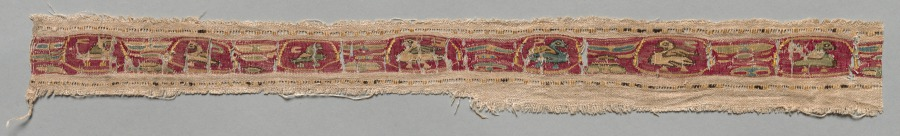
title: Fragment of a Tiraz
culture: Egypt, Fatimid period, 12th century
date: 1100s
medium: tabby ground with inwoven tapestry ornament; linen and silk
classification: Textile